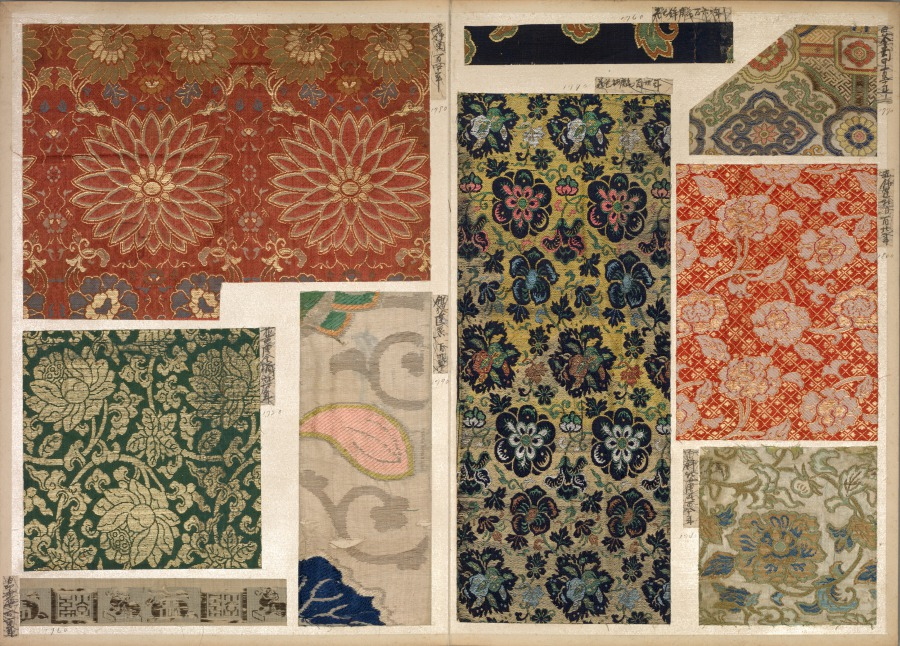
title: Album of Textile Samples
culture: Japan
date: 1790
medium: silk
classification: Textile